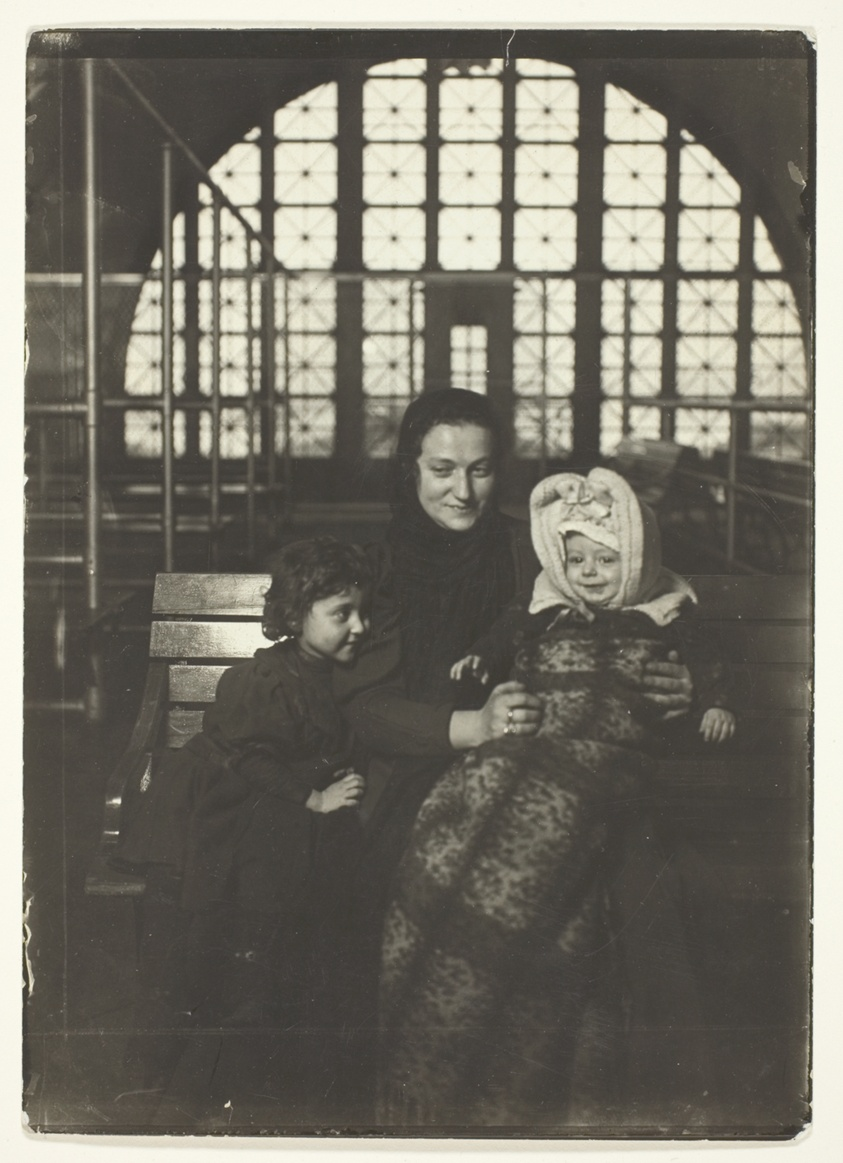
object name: Photograph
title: Russian Family, Ellis Island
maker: Lewis Wickes Hine (American, 1874–1940)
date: 1905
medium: Gelatin silver print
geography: United States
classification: gelatin silver (developing-out-paper) pr; photographic process; photography; photograph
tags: portraits, portraits: multiple subjects, photography, documentary